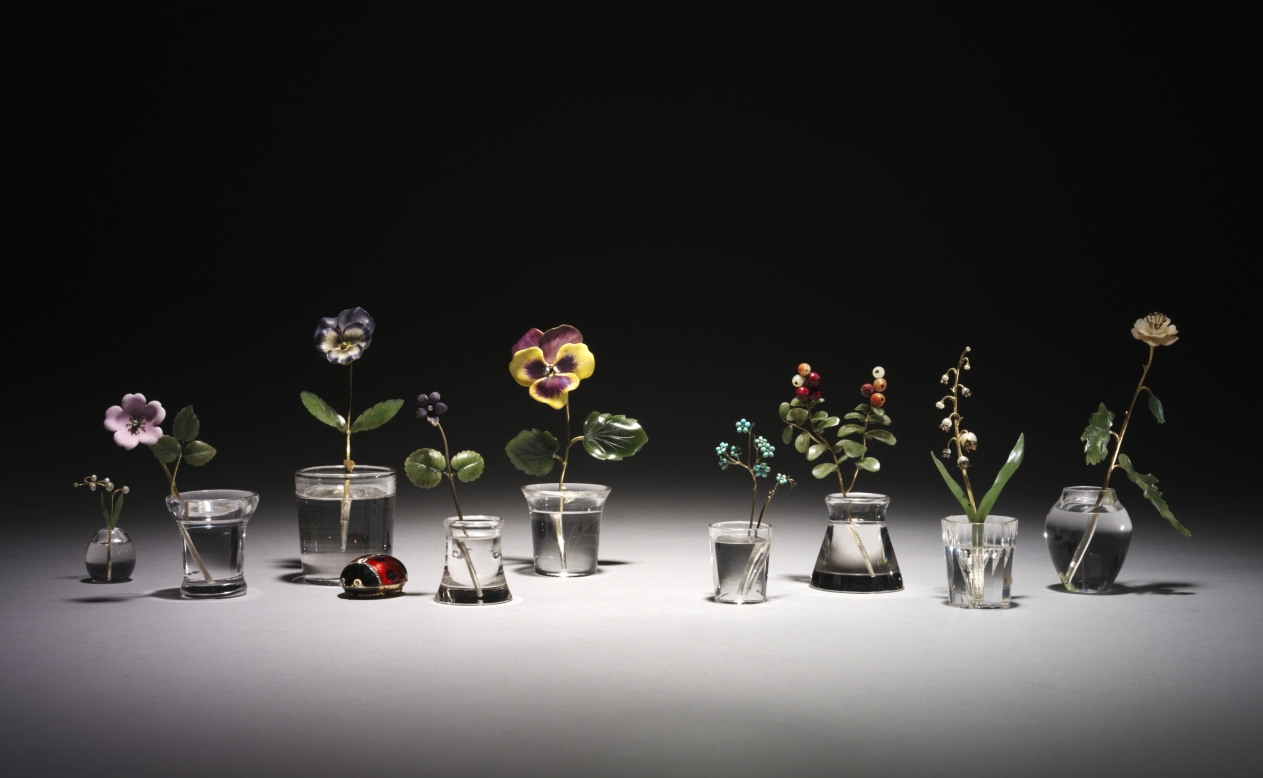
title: Flower Study of a Pansy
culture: Russia, St. Petersburg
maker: House of Fabergé (Russian, 1842–1918)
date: c. 1885–1915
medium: gold, jade, enamel, rock crystal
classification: Miscellaneous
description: This flower study depicts a pansy in bloom. Fabergé’s inspiration for his flower studies is said to have come from the floral brooches of precious stones that were made in the 1700s for Catherine the Great as well as from the Japanese art of flower arranging, known as ikebana. Small and delicate, Fabergé’s flower studies were given as intimate gifts to friends by the tsarina and others in the court. She also liked to take them around to wherever the imperial family was residing as a reminder of spring during the harsh Russian winters.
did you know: The stems of Fabergé’s flower studies are set into little basins carved from rock crystal to resemble pots of water.